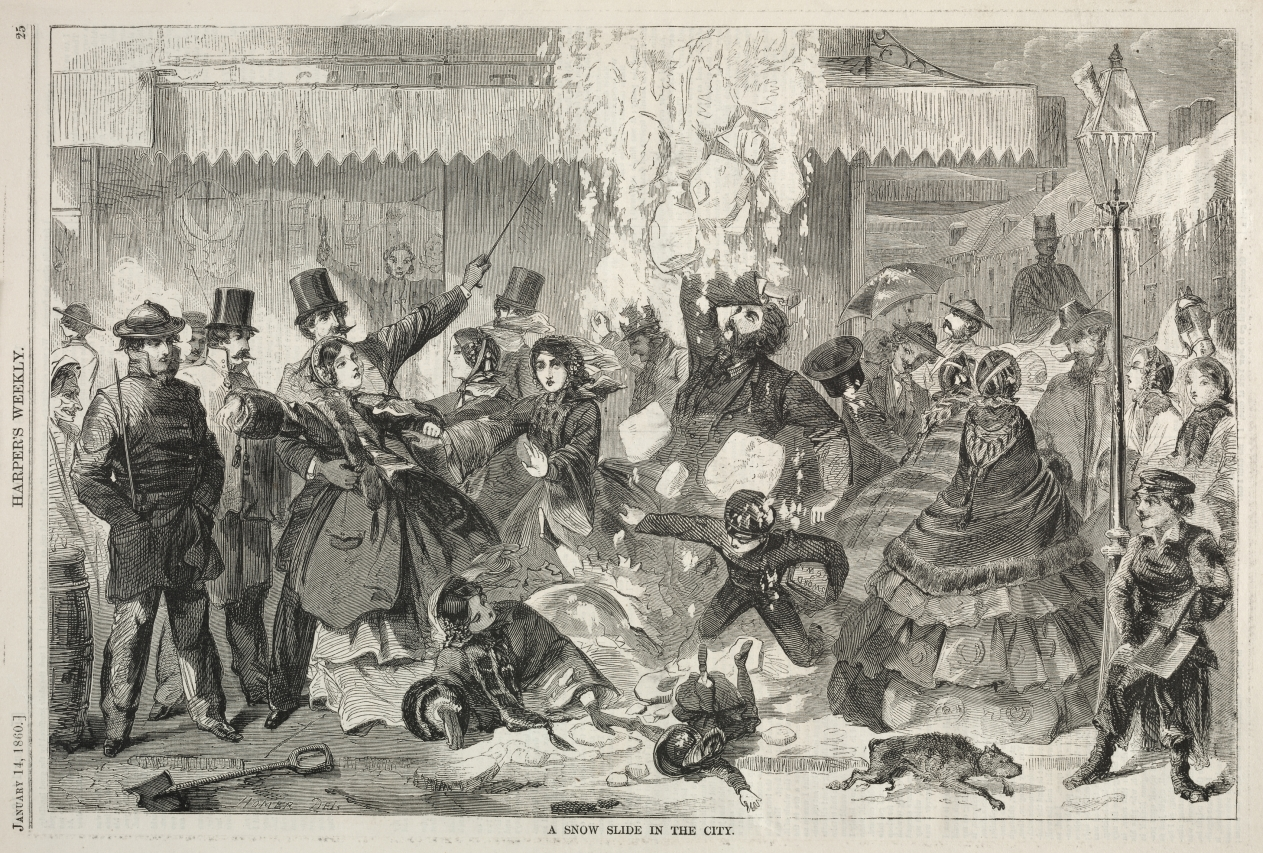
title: A Snow Slide in the City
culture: America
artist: Winslow Homer (American, 1836–1910)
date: 1860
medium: wood engraving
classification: Print